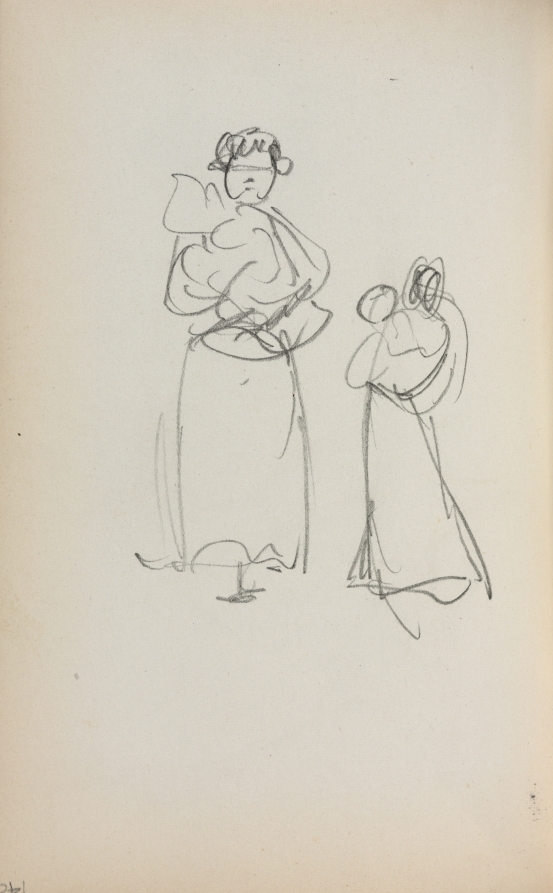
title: Italian Sketchbook: Two Standing Women holding Infants (page 140)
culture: America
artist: Maurice Prendergast (American, born Newfoundland [now Canada], 1858–1924)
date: 1898–1899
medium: pencil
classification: Bound Volume